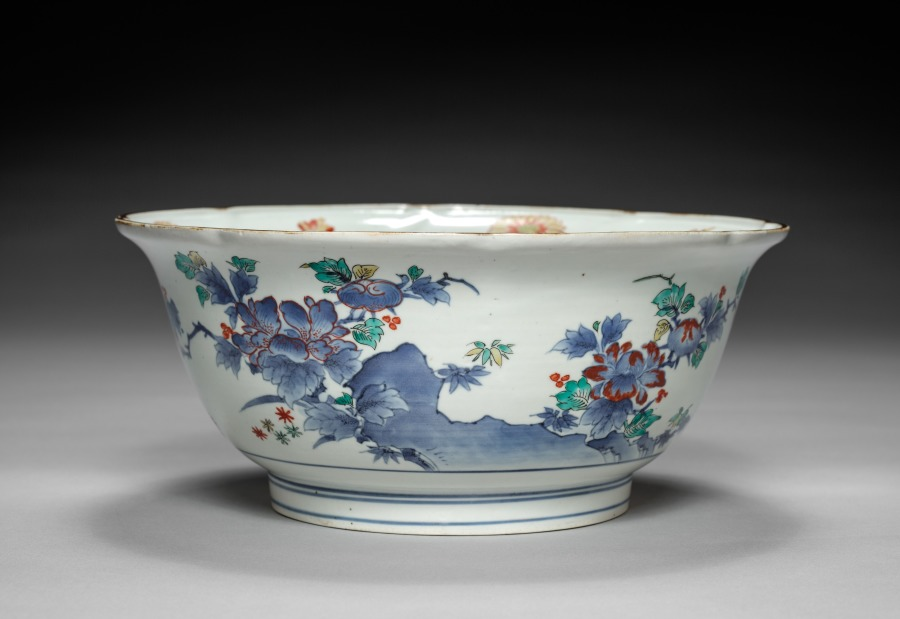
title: Bowl with Lion and Flowers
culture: Japan, Edo period (1615–1868)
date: 1700s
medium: porcelain, molded, with underglaze blue and overglaze color enamel (Hizen ware, Kakiemon type)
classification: Ceramic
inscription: 金